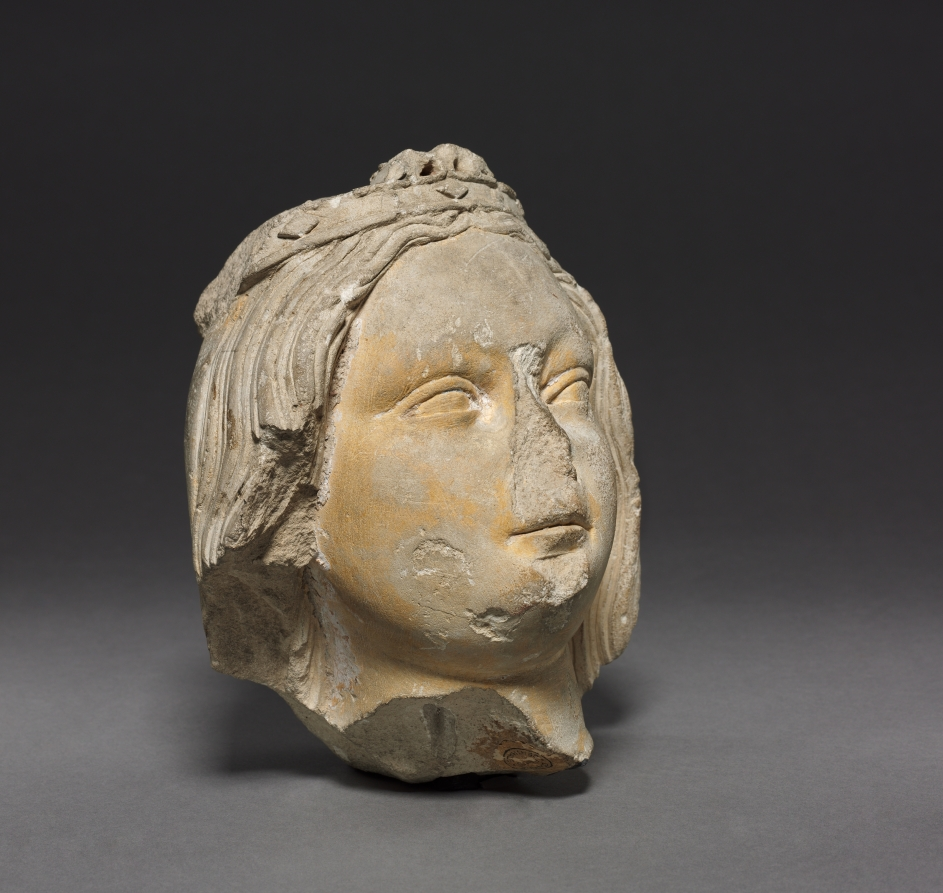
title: Crowned Female Head (Fragment)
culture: France, Champagne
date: c. 1400–1420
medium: limestone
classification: Sculpture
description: The origins of this sculptural fragment are not known. It is perhaps the final trace of the once beautiful figure of a standing Virgin and Child.